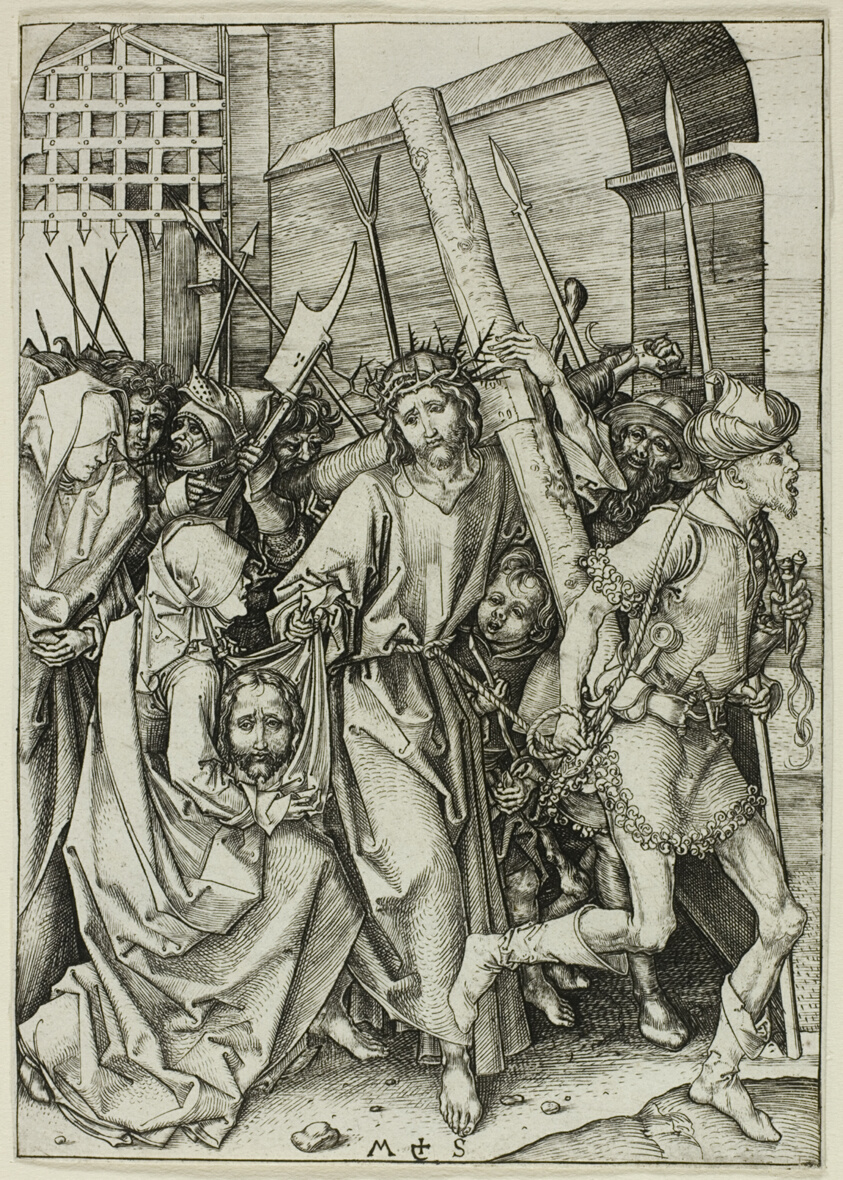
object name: Print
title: The Bearing of the Cross, from The Passion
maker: Martin Schongauer (German, c. 1430/50-1491)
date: c. 1480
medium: Engraving in black on paper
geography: Germany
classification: engraving; print; prints and drawing